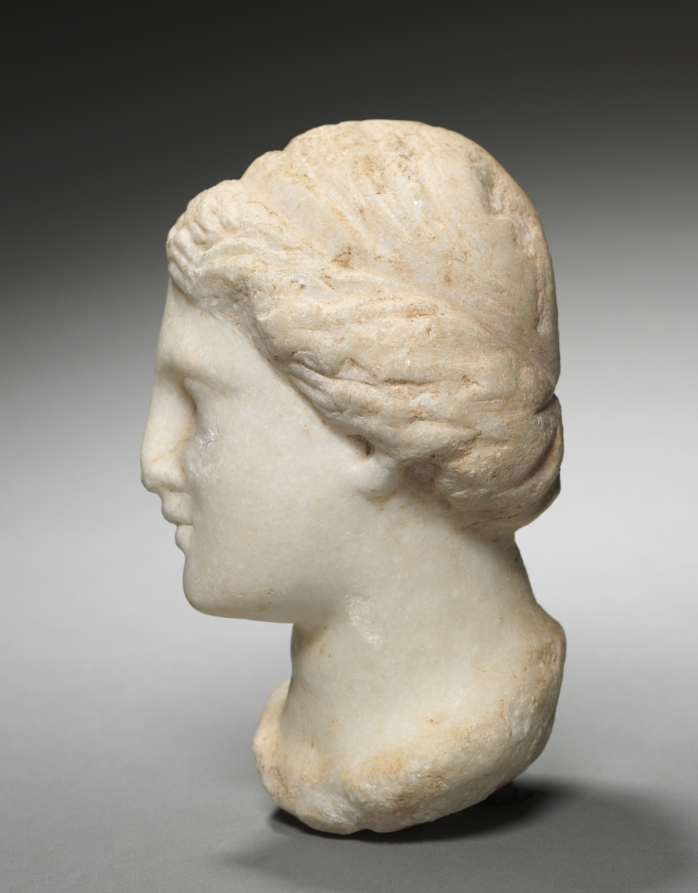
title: Head of a Woman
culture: Greece, Hellenistic period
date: 300–200 BCE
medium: marble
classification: Sculpture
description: The symmetry and proportions of this unidentified woman's portrait harkens back to the classical style made popular in the 4th century BC by the master Greek sculptors Praxiteles and Lysippos. Her center-parted wavy hair, rolled into an up-do, reflects the style of the later Hellenistic period when this work was made.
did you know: This hairstyle was achieved by rolling the hair and tucking it into the band behind the ears.